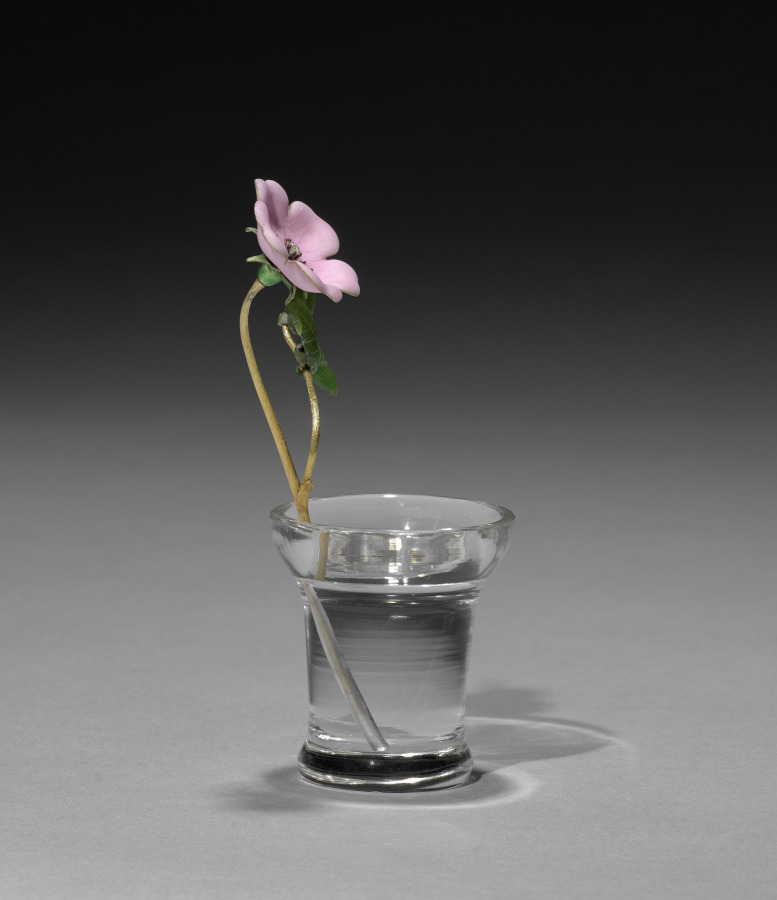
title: Flower Study of a Wild Rose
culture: Russia, St. Petersburg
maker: House of Fabergé (Russian, 1842–1918)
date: c. 1885–1915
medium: gold, silver, enamel, diamond, jade, rock crystal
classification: Miscellaneous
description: This delicate flower study resembles a stem of wild rose. Fabergé’s inspiration for his flower studies is said to have come from the floral brooches of precious stones that were made in the 1700s for Catherine the Great as well as from the Japanese art of flower arranging, known as ikebana. Small and delicate, Fabergé’s flower studies were given as intimate gifts to friends by the tsarina and others in the court. She also liked to take them around to wherever the imperial family was residing as a reminder of spring during the harsh Russian winters.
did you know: The stems of Fabergé’s flower studies are set into little basins carved from rock crystal to resemble pots of water.